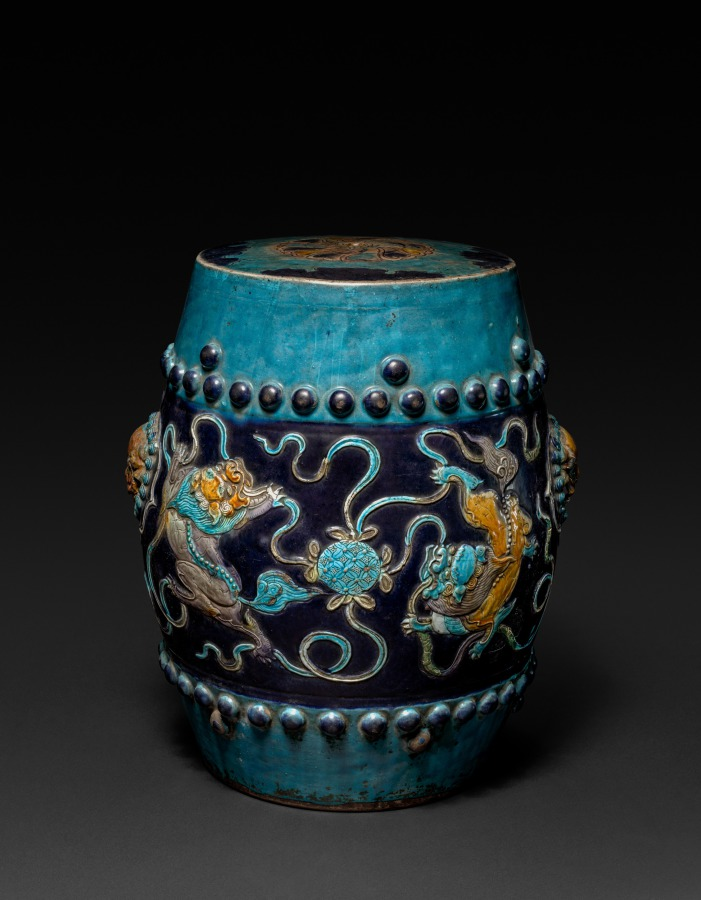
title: Garden Seat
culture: China, Jiangxi Province, Ming dynasty (1368–1644)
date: 1368–1644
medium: porcelain, Fahua ware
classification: Ceramic